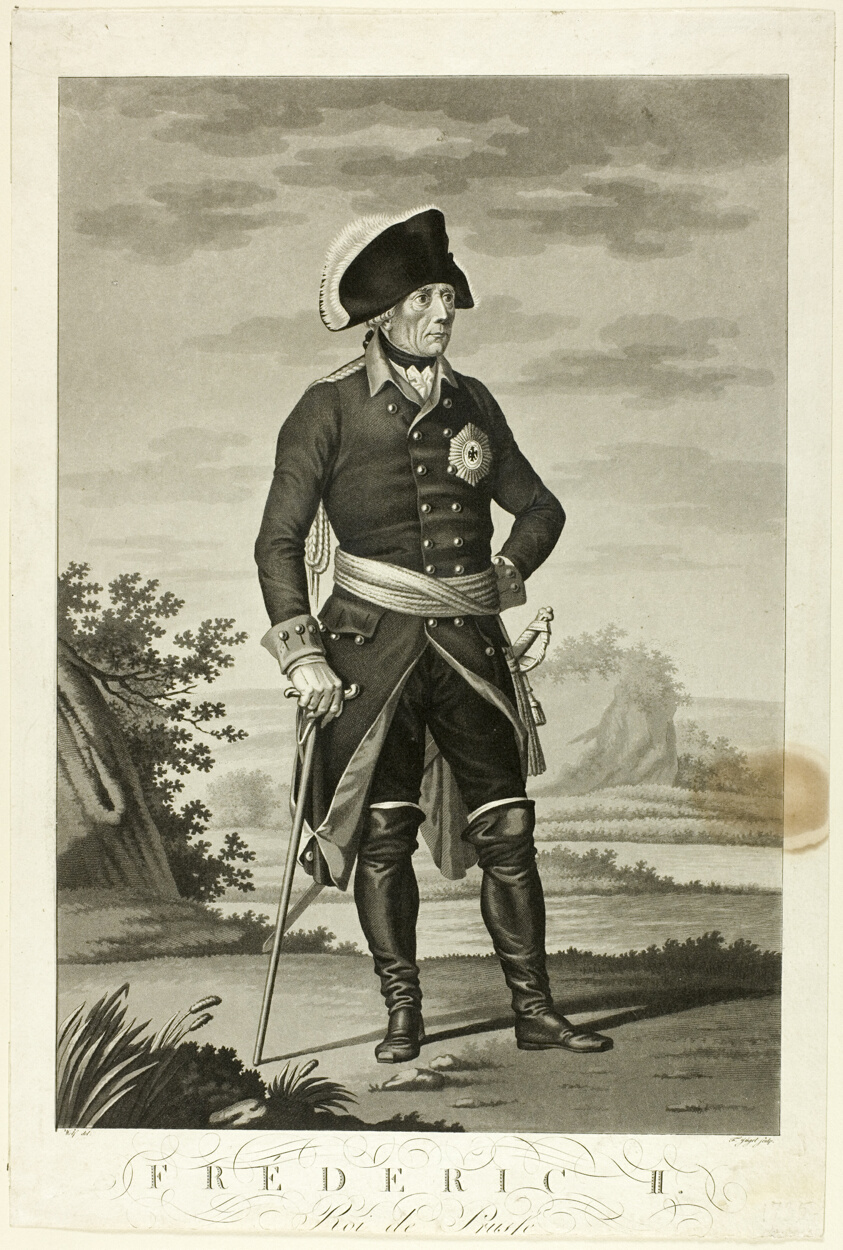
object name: Print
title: Frederick II, Roi de Prusse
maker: Johann Friedrich Jugel (German, 18th and 19th century)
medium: Aquatint and engraving on paper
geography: Germany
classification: aquatint; print; prints and drawing